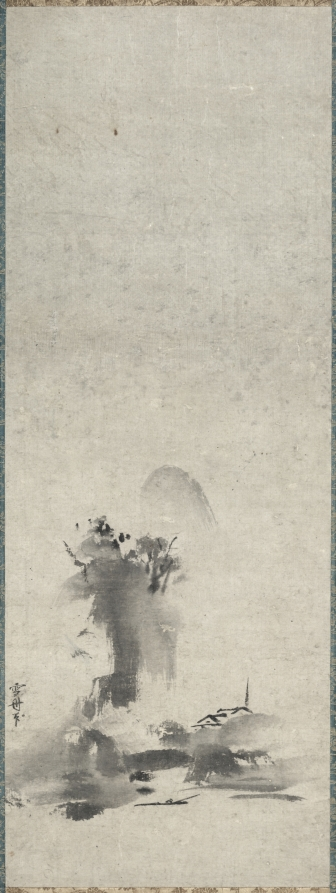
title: Haboku, Splashed Ink Landscape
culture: Japan, Muromachi period (1392–1573)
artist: Sesshū Tōyō (Japanese, 1420–1506)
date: 1400s–early 1500s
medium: hanging scroll; ink on paper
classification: Painting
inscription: signed Sesshu hitsu.